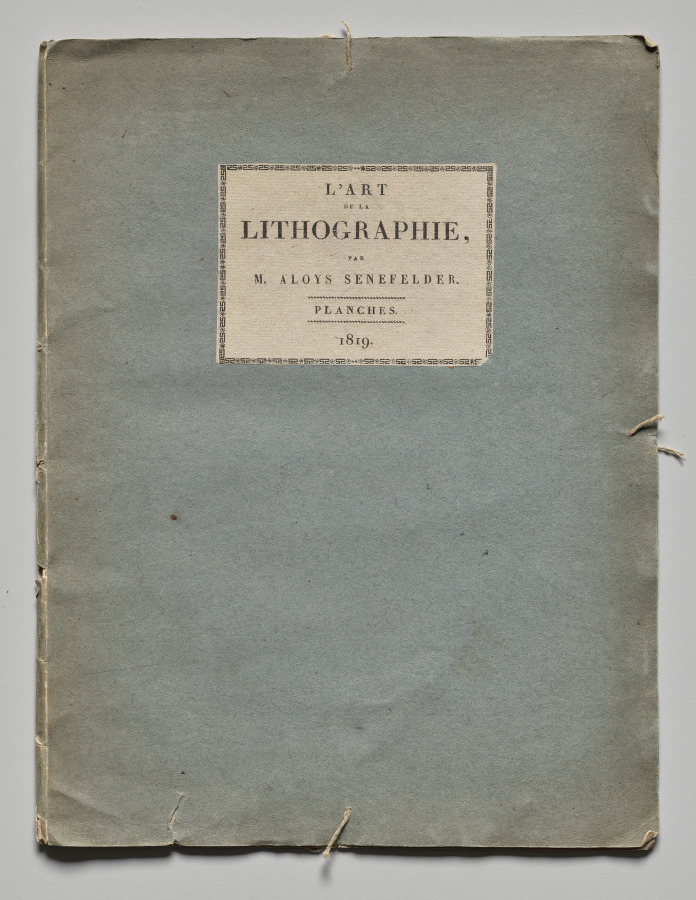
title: Art of the Lithograph: Volume I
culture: Germany, 19th century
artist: Alois Senefelder (German, 1771–1834)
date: 1819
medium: book of lithographs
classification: Bound Volume